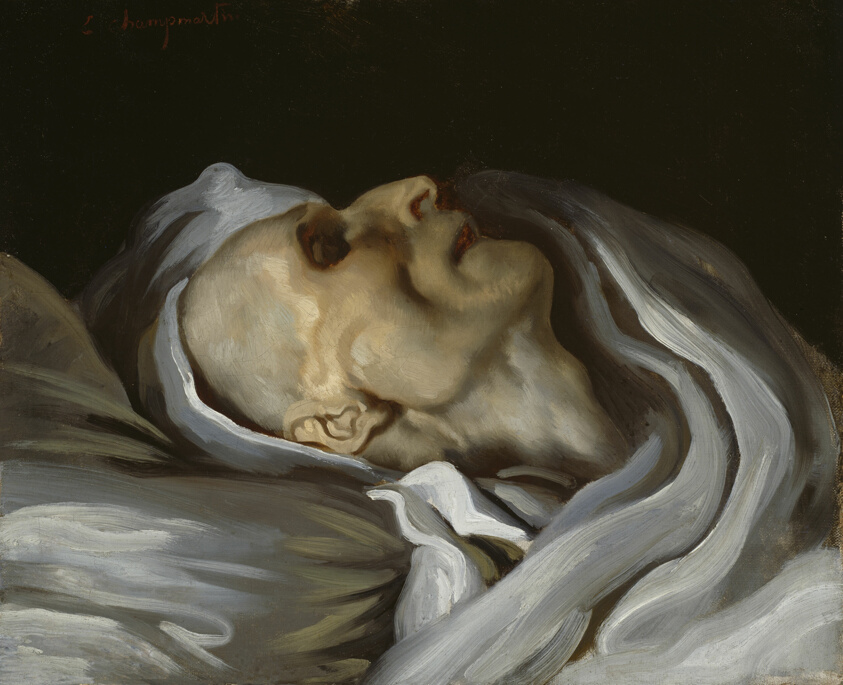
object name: Painting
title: Théodore Géricault on His Deathbed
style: 19th century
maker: Charles Emile Callande de Champmartin (French, 1797–1883)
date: 1824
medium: Oil on canvas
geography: France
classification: oil on canvas; french; oil paintings (visual works); paint; painting; european painting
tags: death, portraits: European subject, portraits: French subject, portraits, portraits: male subject, portrait, artist, bed, Sickness